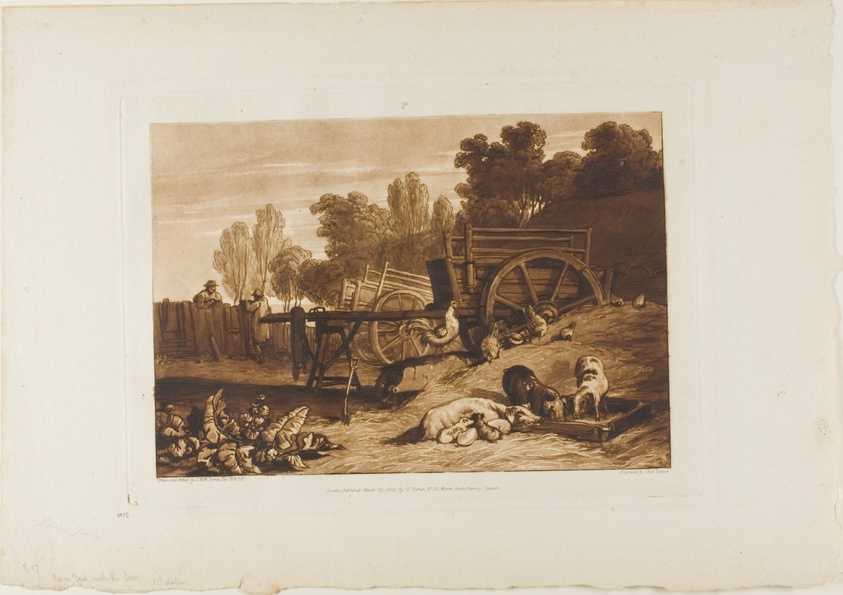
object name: Print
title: The Farm Yard with the Cock, plate 17 from Liber Studiorum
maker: Joseph Mallord William Turner (English, 1775-1851); Engraved by Charles Turner (English, 1773-1847)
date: published March 29, 1809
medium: Etching and engraving in brown on ivory paper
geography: England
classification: etching; print; prints and drawing